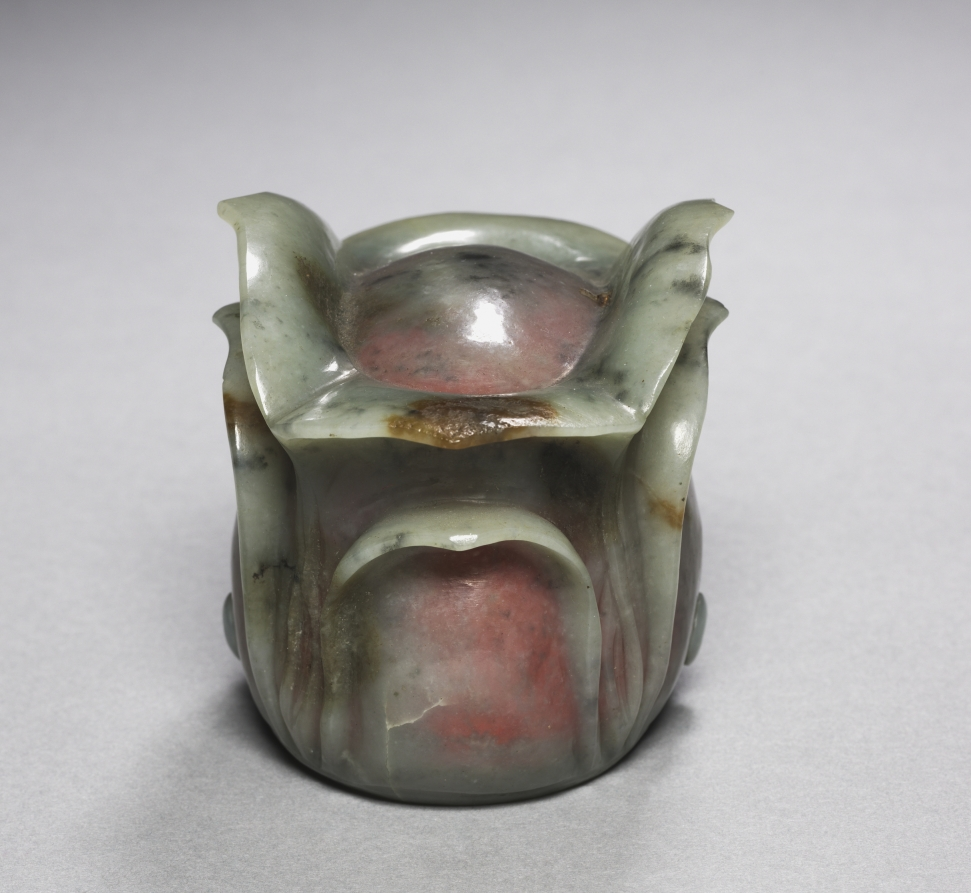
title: Daoist Cap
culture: China, Song dynasty (960-1279) - Yuan dynasty (1271-1368)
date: 960–1279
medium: grayish-green jade with brown and black markings; interior with pink pigment and gold inlays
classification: Jade